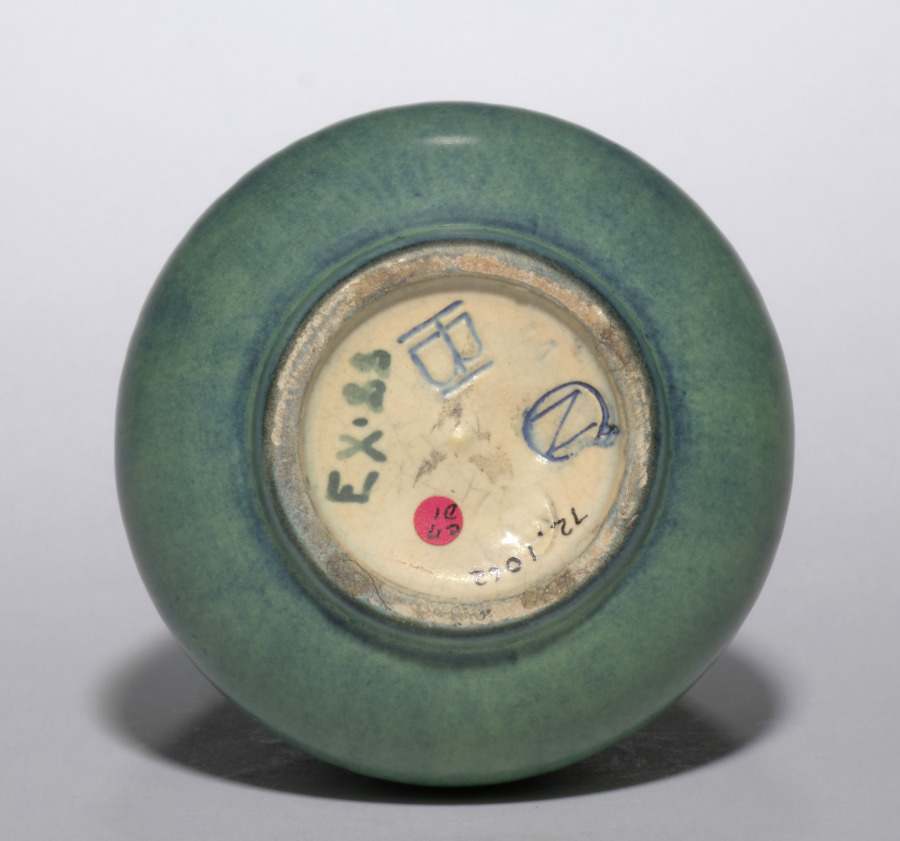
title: Vase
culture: America, Louisiana, New Orleans, 20th century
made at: Newcomb Pottery (American, 1895–1940)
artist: Henrietta Bailey (American, 1874–1950)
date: 1900s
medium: glazed ceramic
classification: Ceramic